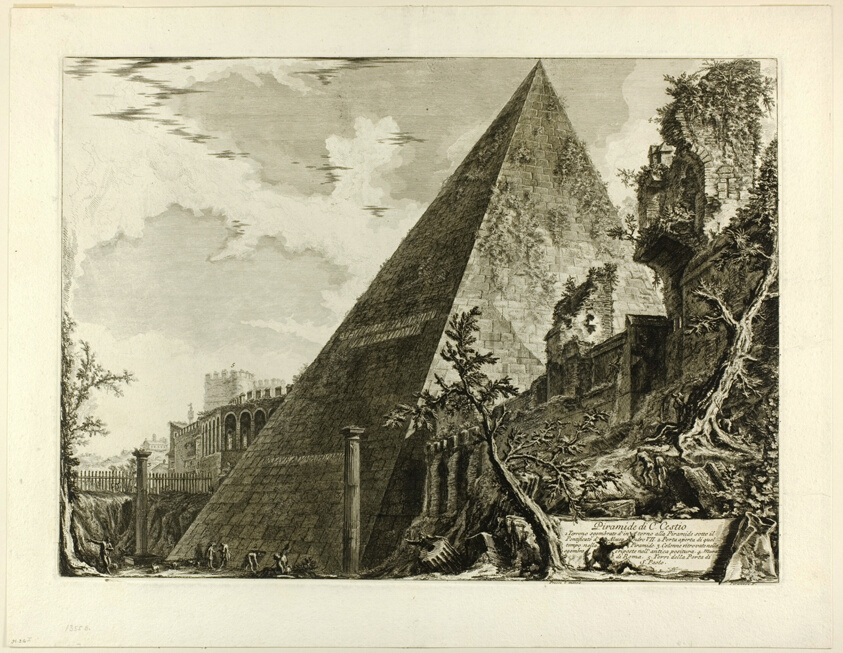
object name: Print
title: The Pyramid of Gaius Cestius, from Views of Rome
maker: Giovanni Battista Piranesi (Italian, 1720-1778); published by Francesco (Italian, 1758-1810) and Pietro Piranesi (Italian, born 1758/59)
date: 1750/59, published 1800–07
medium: Etching on heavy ivory laid paper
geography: Italy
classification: etching; print; prints and drawing